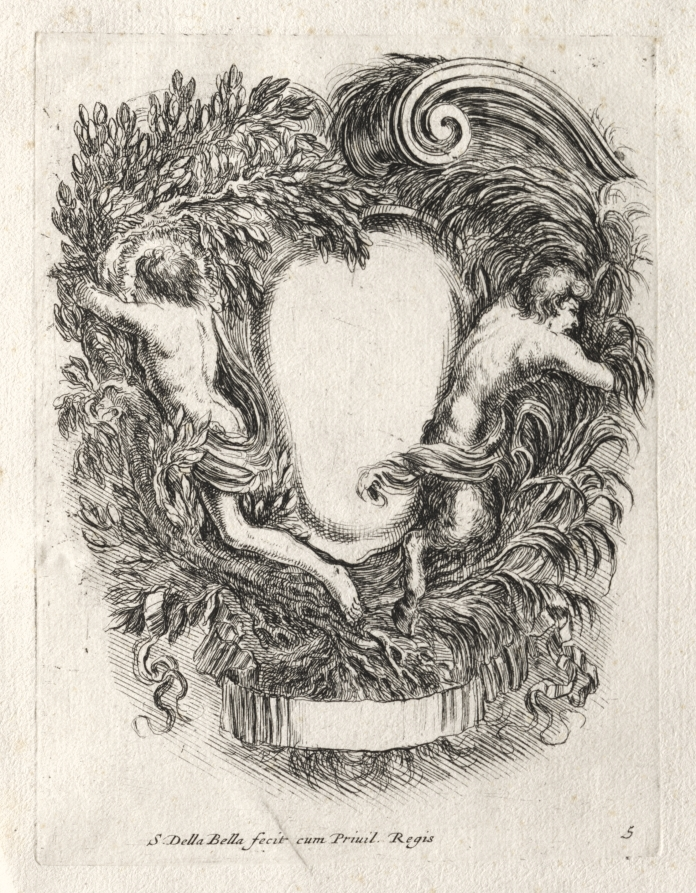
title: New Model for a Cartouche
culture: Italy, 17th century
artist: Stefano Della Bella (Italian, 1610–1664)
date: 1647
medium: etching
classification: Print